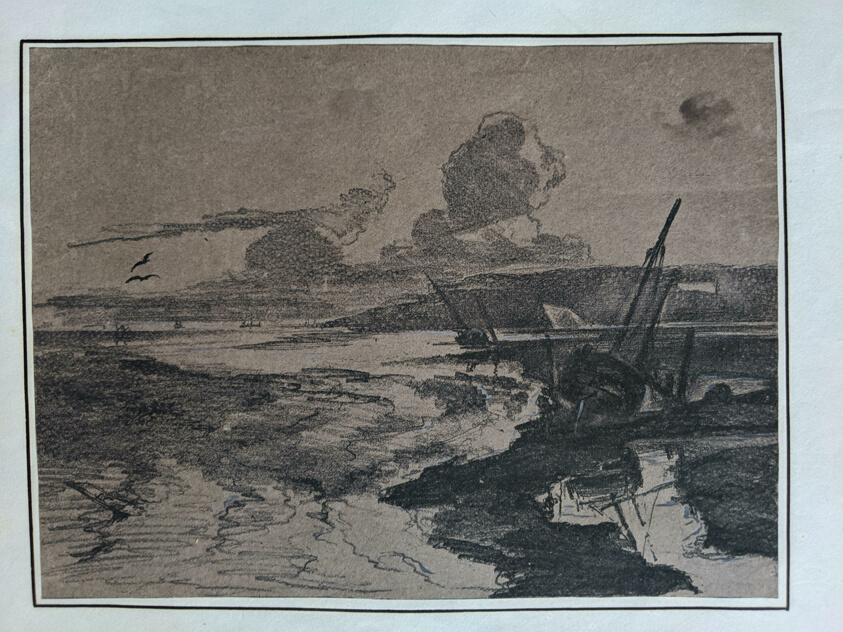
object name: Print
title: Studies of Landscapes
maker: François-Thomas-Louis Francia (French, 1772–1839); after various English artists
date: 1810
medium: 46 soft ground etchings in black, some heightened with wash, on ivory, blue, and buff wove papers, mounted onto 39 sheets of cream wove paper, ruled with pen and brown ink (with 5 unrelated prints)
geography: France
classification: prints and drawing; paper; print; etching